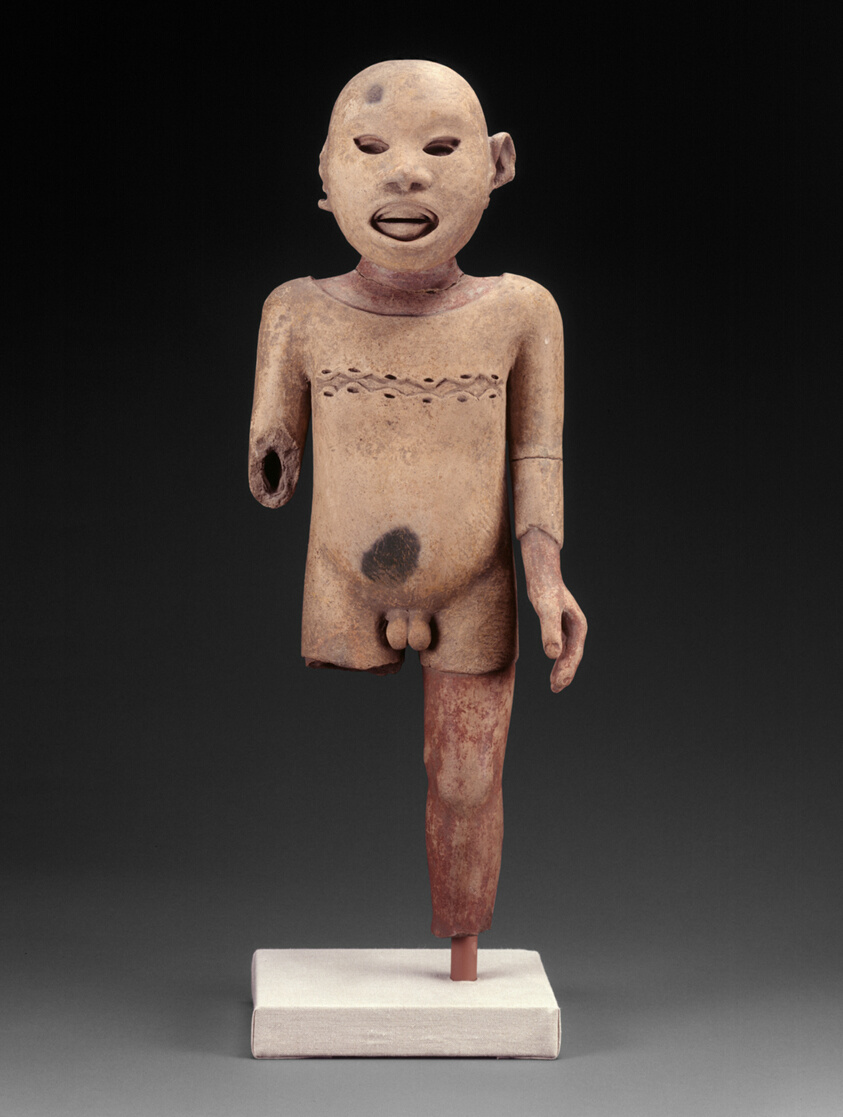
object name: Sculpture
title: Ritual Impersonator of the Deity Xipe Totec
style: aztec, mesoamerican, Pre-Columbian, americas, Arts of the Americas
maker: Aztec (Mexica) (Possibly central Veracruz, Mexico)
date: 1450–1500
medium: Ceramic and pigment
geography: Veracruz state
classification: sculpture; art of the americas; ceramics; statue; ritual objects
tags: sacrifice, ritual sacrifices, agriculture, rituals, mythology, masks